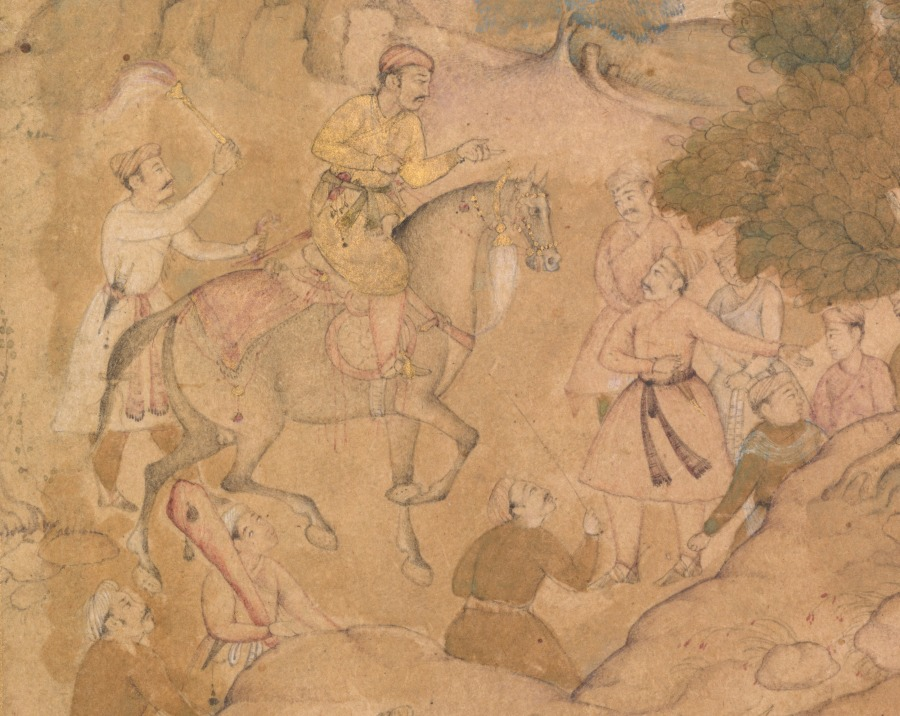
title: Akbar supervising the capture of wild elephants at Malwa in 1564, painting 90 from an Akbar-nama (Book of Akbar) of Abu’l Fazl (Indian 1551–1602)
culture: India, Mughal court, made for Emperor Akbar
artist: attributed to Farukh Chela (Indian)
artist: or Govardhan (Indian, active c.1596–1645)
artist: or Dhanraj (Indian)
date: c. 1602–3; borders added c. 1700s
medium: ink with use of colors and gold on paper, mounted on an album page with borders of gold-decorated buff and blue paper (verso); calligraphy by Faqir Ali (recto)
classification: Painting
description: This painting is from a biography of Akbar made shortly before his death. It depicts a historical event from early in his reign when he encountered a herd of wild elephants and captured many of them for his royal stables. Akbar rides horseback in the upper left, directing his men as two trained elephants give chase in the foreground. The Mughals caught wild elephants by chasing them with tame elephants, then tethering them together and feeding them their favorite food. European prints had made their way into Akbar’s collection, and they provided the visual source for distant cityscapes, rolling hills, and less densely colored paintings.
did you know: A yak-tail flywhisk, ancient Indian symbol of sovereignty, is held up for Akbar.